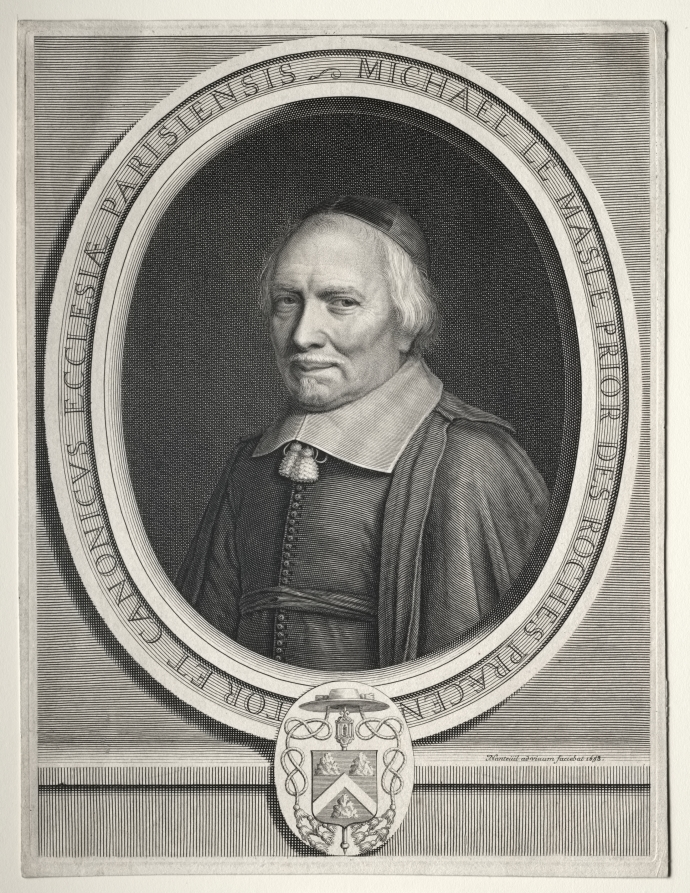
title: Michel le Masle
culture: France, 17th century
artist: Robert Nanteuil (French, 1623–1678)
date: 1658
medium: engraving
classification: Print